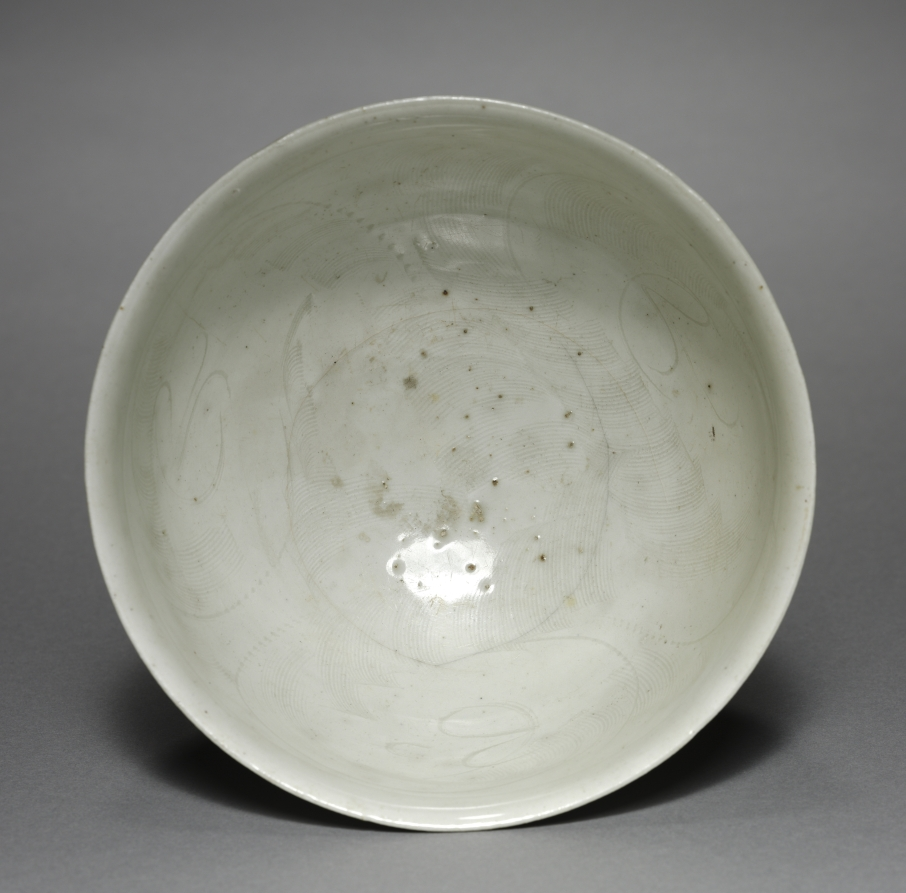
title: Bowl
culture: Korea, Goryeo dynasty (918–1392)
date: 1300s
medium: pottery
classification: Ceramic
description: While this cup was donated as a rare white celadon example excavated from a Goryeo period tomb, it turns out to be an imported Song period Chinese example. This suggests that many Korean elites during the Goryeo dynasty (918–1392) enjoyed various imported luxury from China known for its advanced ceramic production.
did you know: While this cup was donated as a rare white celadon example excavated from a Goryeo period tomb, it turns out to be an imported Song period Chinese example.